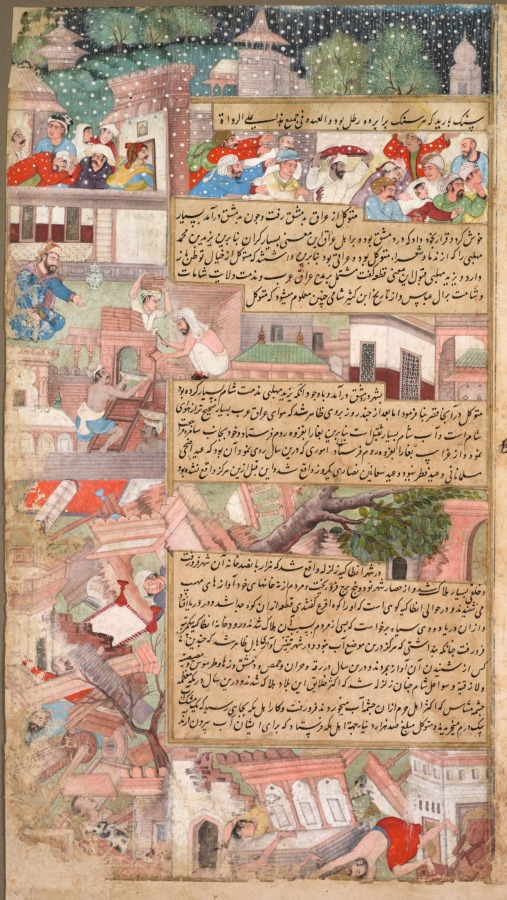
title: Page of disasters, from the Tarikh-i Alfi (History of the Thousand [Years])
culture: India, Mughal, 16th century, made for Akbar (reigned 1556–1605)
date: c. 1595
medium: Gum tempera, ink, and gold on paper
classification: Painting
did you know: Devastation after an earthquake includes a horse trapped under a fallen pavilion.